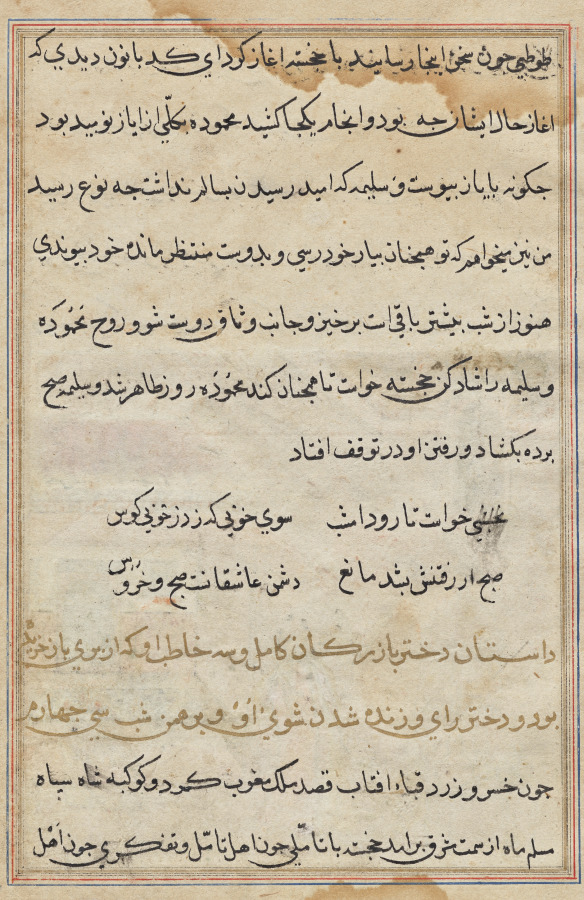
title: Page from Tales of a Parrot (Tuti-nama): text page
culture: Mughal India, court of Akbar (reigned 1556–1605)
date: c. 1560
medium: gum tempera, ink, and gold on paper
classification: Painting